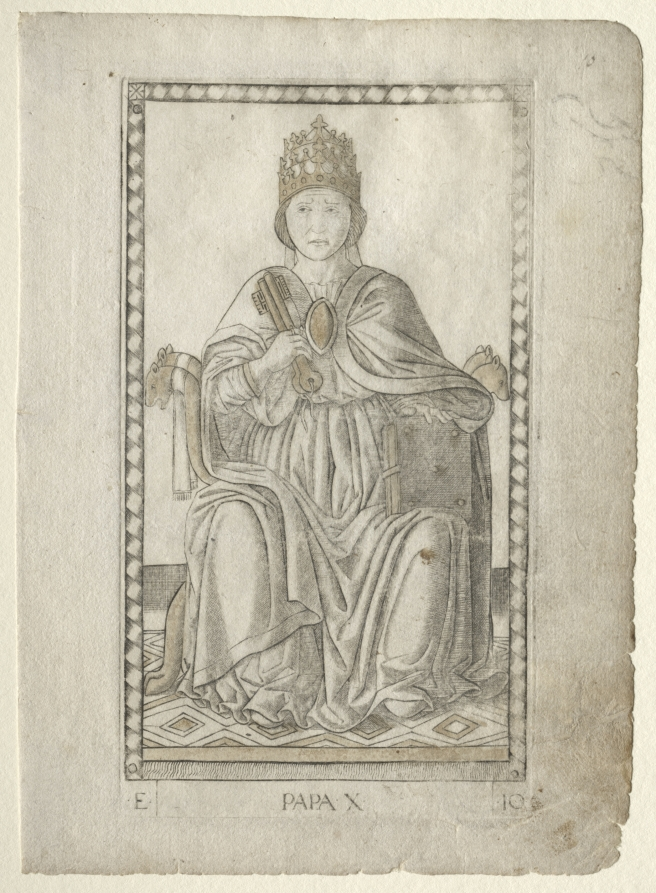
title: The Pope (from the Tarocchi, series E: Conditions of Man, #10)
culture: Italy, Ferrara, 15th century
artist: Master of the E-Series Tarocchi (Italian, active 1460s)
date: before 1467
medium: engraving hand-colored with gold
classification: Print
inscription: Lettered below the image of Pope (The Pope): ·E· / PAPA·X· / ·10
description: This engraving is part of the Tarocchi group marked with the letter “E,” and named Conditions of Man. This series outlines the social and hierarchical order of ten characters (Beggar, Servant, Artisan, Merchant, Gentleman, Knight, Doge King, Emperor, and Pope), starting from the lower grade and ending with the most important one. Here, Pope (The Pope) is shown as a full-length male figure, facing front, and seated on a throne with lion armrests. He wears his papal hat, called tiara. The pope holds two keys in his right hand, whilst his other hand rests on a book placed on his left leg.